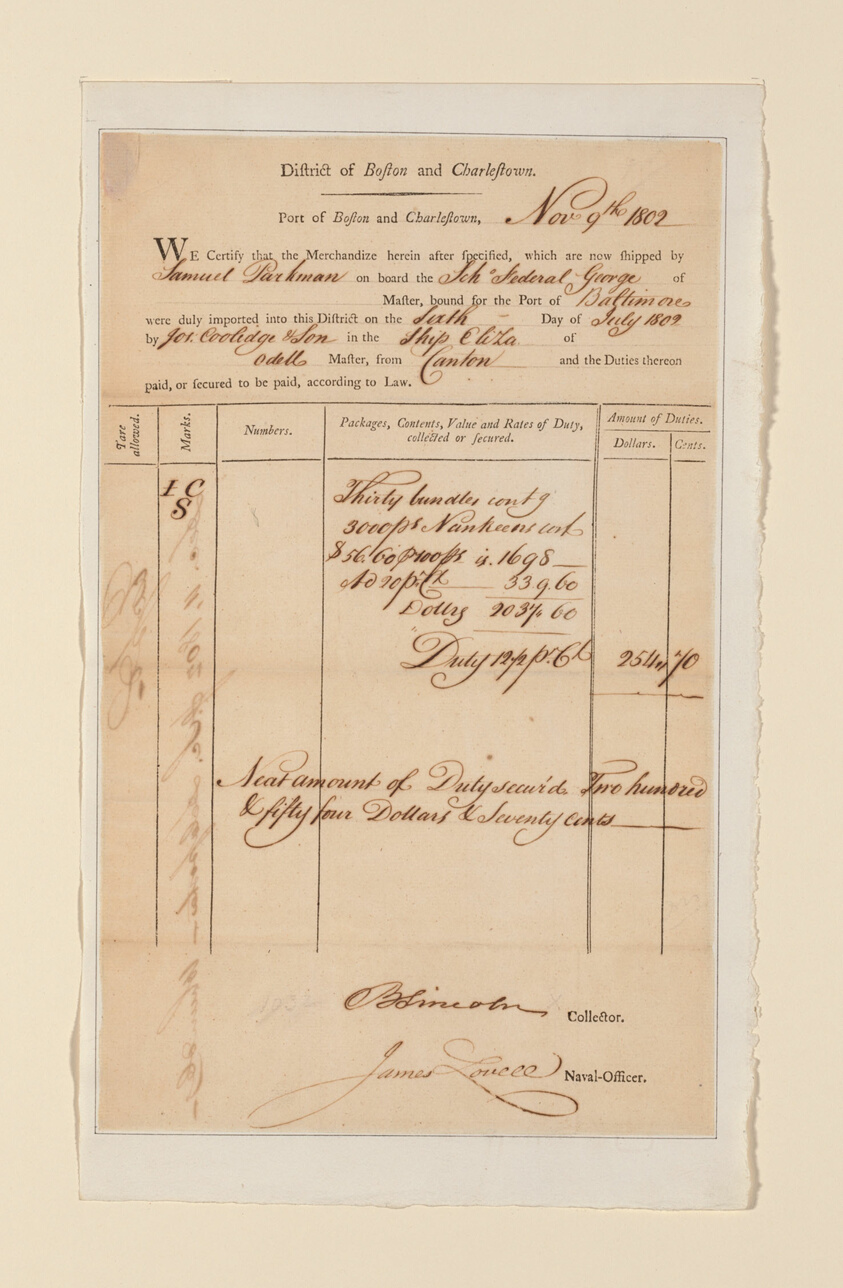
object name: Textile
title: Charlestown Bill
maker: United States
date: 1802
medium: Ink on paper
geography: United States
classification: textile; accessory - paper design; accessories (object genre)